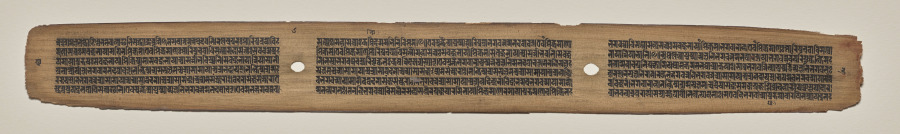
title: Text, Folio 6 (verso), from a Manuscript of the Perfection of Wisdom in Eight Thousand Lines (Ashtasahasrika Prajnaparamita-sutra)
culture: Eastern India, Bihar, Vikramashila Monastery. Painting: Nepal, Kathmandu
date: Sunday, September 14, 1119 (year 239 of the Newar Samvat in the month of Ashvina)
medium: gum tempera and ink on palm leaves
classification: Painting